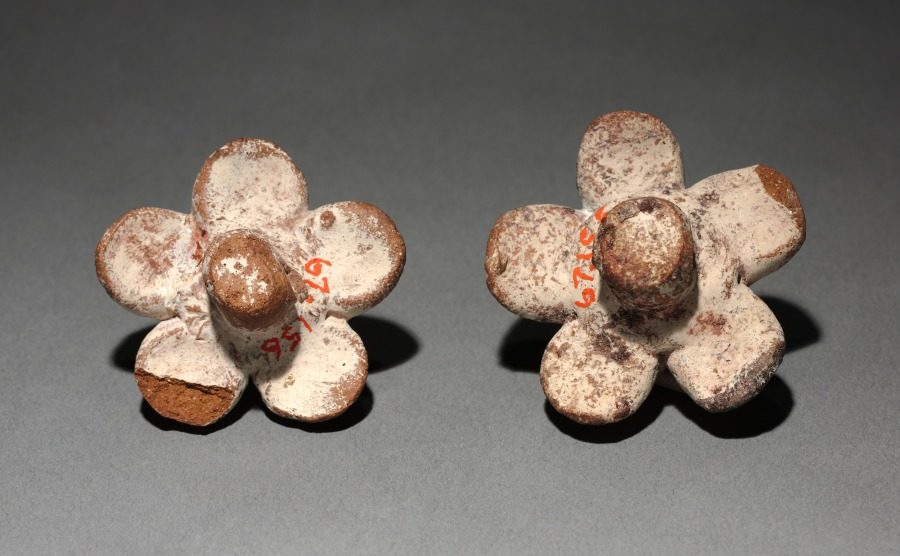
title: Pair of Figure in Flower Ornaments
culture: Mexico, Yucatán, Jaina Island region, Campeche, Maya style (250-900)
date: 500–900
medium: earthenware with slip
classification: Jewelry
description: Figures within flowers are one of the most enchanting themes of the Maya ceramic art of Jaina, an island off the western Yucatán coast. The figures, usually males who cross their arms over their bodies, are either radiantly youthful or aged (as here), suggesting a relationship to the life cycle.